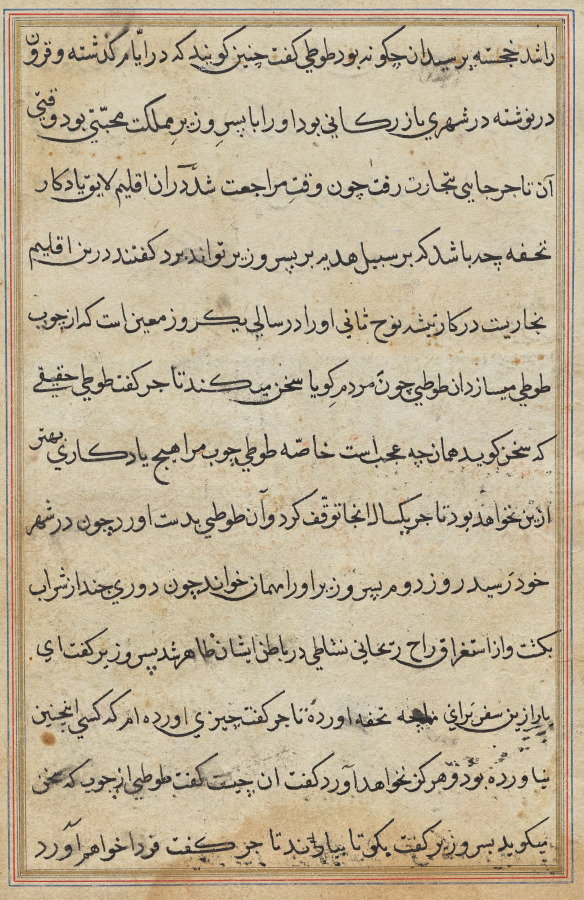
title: Page from Tales of a Parrot (Tuti-nama): text page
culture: Mughal India, court of Akbar (reigned 1556–1605)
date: c. 1560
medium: gum tempera, ink, and gold on paper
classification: Painting